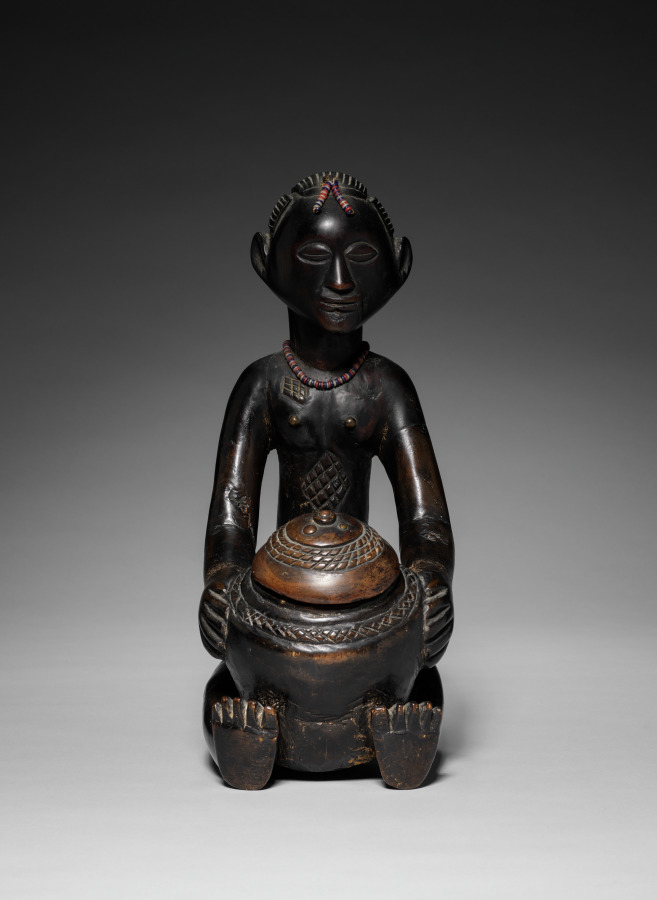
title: Female Bowl-Bearing Figure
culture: Africa, Central Africa, Democratic Republic of Congo, Luba-style carver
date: late 1800s-early 1900s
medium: Wood, glass beads, upholstery studs, plant fiber, and iron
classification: Sculpture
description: In Luba-style art, an object's beauty affects how well it works. While bowl-bearing figures had many possible uses, a royal diviner likely used this well-carved image of a woman carrying a bowl in rituals. Dusty traces of mpemba (white chalk) fleck the shining exterior and the bowl's interior, showing it once held this sacred powder. Diamond-shaped scarification marks at her waist, chest, and back add to her beauty. Her hair is carved into the cascading layered hairstyle worn in the Luba region at the turn of the twentieth century. Strands of imported glass beads encircle her waist and neck, and dangle from her hair. The alternating white and blue beads may symbolize the moon and Mbidi Kiluwe, a culture hero linked to royal practice and smithing. While much Luba-style art depicts women—who are societally important—men created and owned the majority of such works.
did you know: Symbolic of anvils, the round metal tacks decorating the figure's hair "pin" spirits and their secrets within it. They are at the hairline and each of the four hair cascades (the bottommost is now gone).